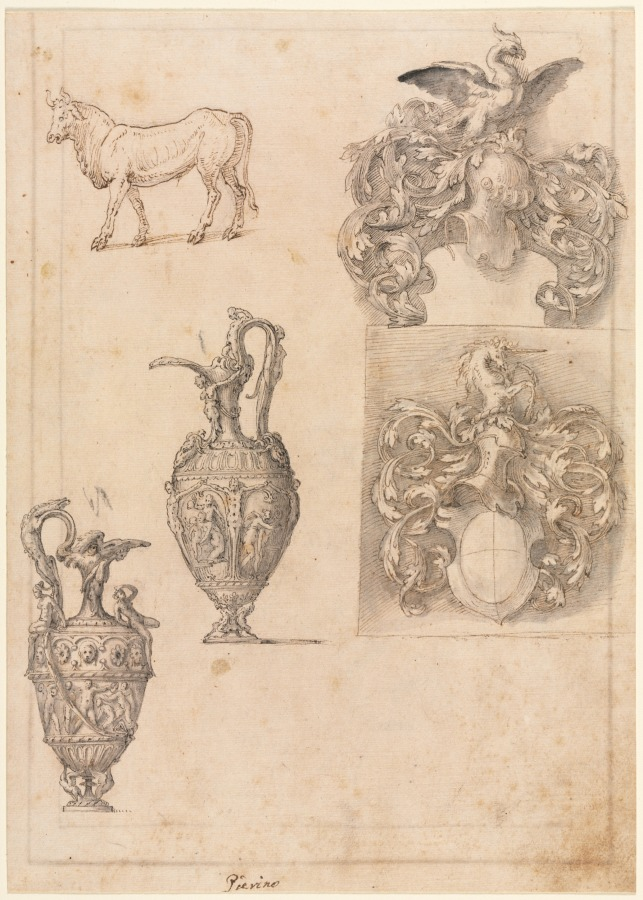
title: Design for Two Vases, Two Coats of Arms, and a Bull (recto) Several Line Borders (verso)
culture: Italy, 16th century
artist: Luzio Romano (Italian, active 1528–75)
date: mid 1500s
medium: pen and brown ink and brush and gray and brown wash over black chalk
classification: Drawing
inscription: lower center, in brown ink: Pierino ; VERSO OF SECONDARY SUPPORT, lower right, in graphite: A3103